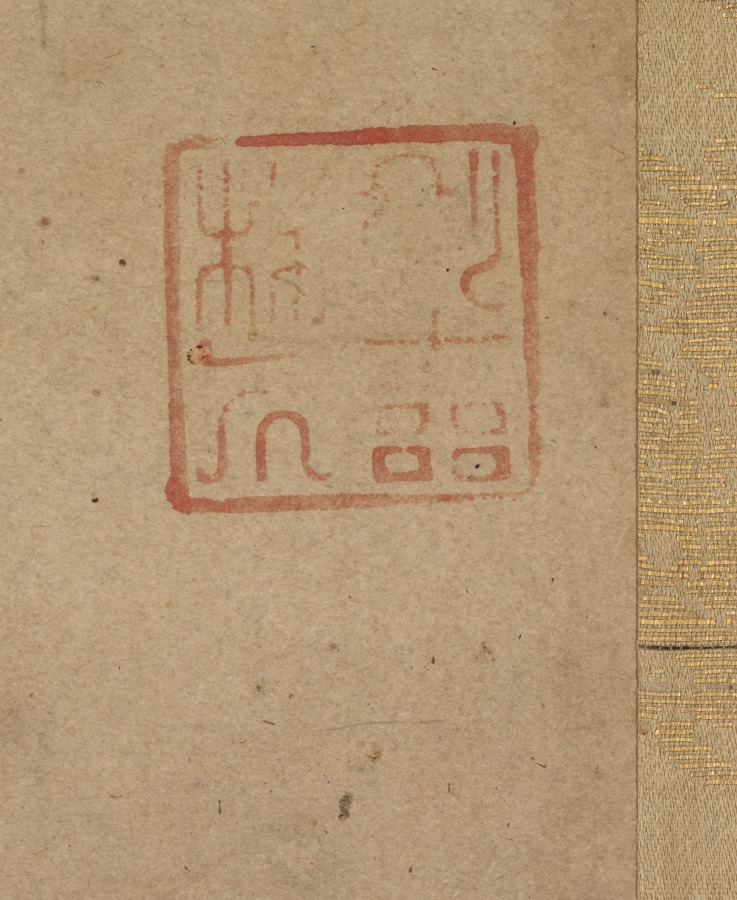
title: Fish and Seaweed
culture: Japan, Momoyama period (1573–1615)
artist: Rinkyo (Japanese)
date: 1573–1615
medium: one of a pair of hanging scrolls; ink on paper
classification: Painting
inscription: artist's seal at mid-right edge of painting.